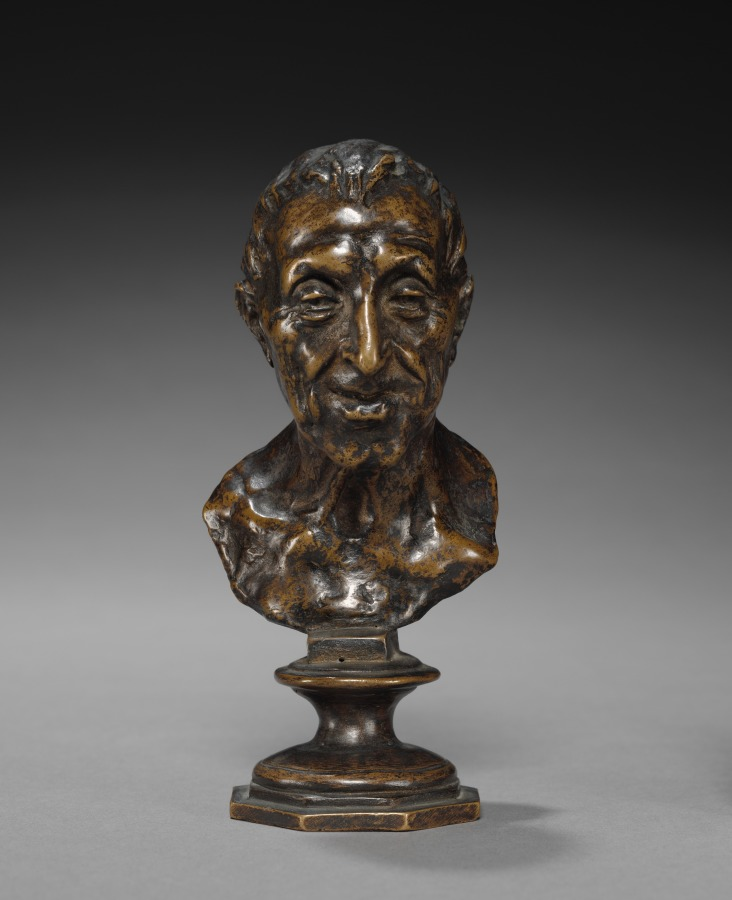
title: Head of a Man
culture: Italy, late 19th-early 20th century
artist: Vincenzo Gemito (Italian, 1852–1929)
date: c. 1875 – 1929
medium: bronze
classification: Sculpture